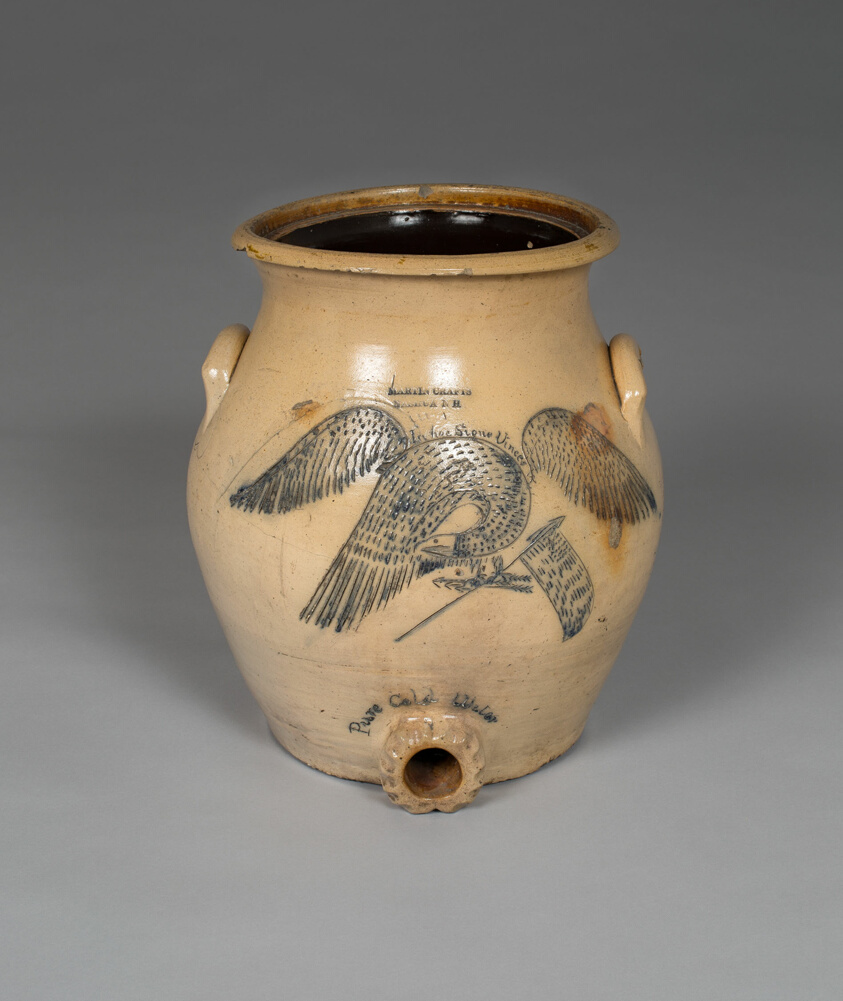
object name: Ceramics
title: Water Cooler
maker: Martin Crafts Pottery; American, founded 1838; Nashua, New Hampshire; Martin Crafts (1807-1880)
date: 1839–52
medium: Stoneware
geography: Nashua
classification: container; stoneware; ceramics; american decorative arts; american arts; decorative arts